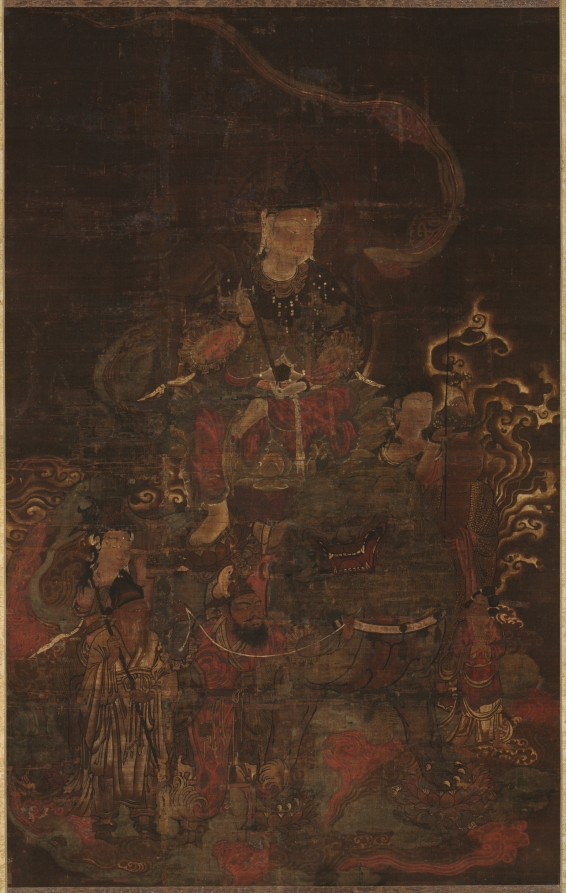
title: Monju Riding Lion with Attendants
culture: Japan, Kamakura period (1185–1333)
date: 1200s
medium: Hanging scroll; ink and color on silk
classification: Painting